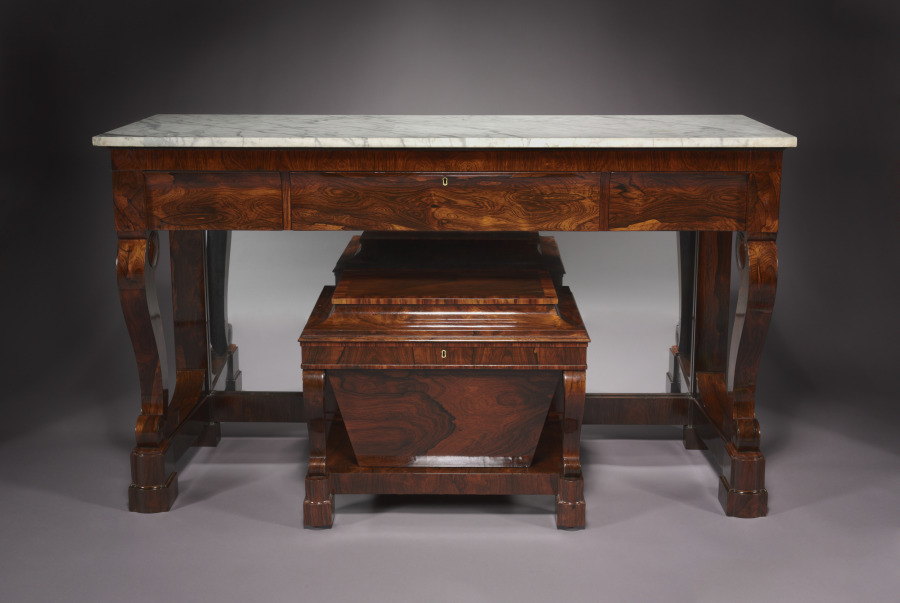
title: Sideboard and Cellarette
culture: America, New York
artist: Duncan Phyfe and Son (American, 1768–1854)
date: c. 1840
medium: chiefly rosewood veneer with pine and poplar secondary woods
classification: Furniture and woodwork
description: This sideboard and cellarette would have graced a 19th-century room. Notice the keyholes on the drawers of both pieces. Expensive silver utensils were stored in the sideboard and wine was kept under lock and key in the cellarette.